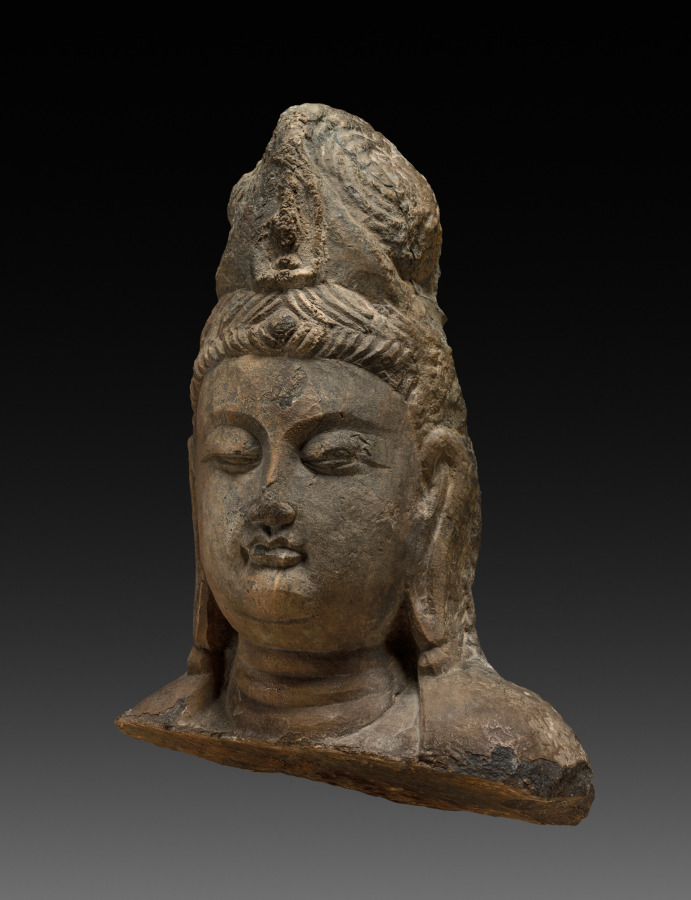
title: Head of Bodhisattva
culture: China, from Lung-mên, Tang dynasty (618-907)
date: 618–907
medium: dark gray limestone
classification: Sculpture